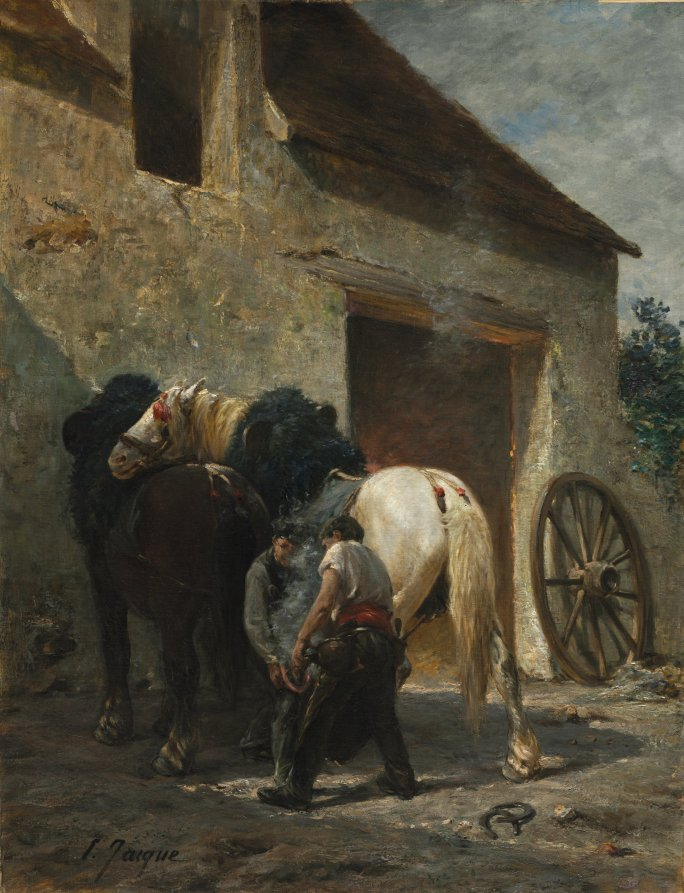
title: Blacksmiths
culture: France, 19th century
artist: Émile Jacque (French, 1848–1912)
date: after 1887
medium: oil on fabric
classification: Painting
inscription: Signed lower left: E. Jacque